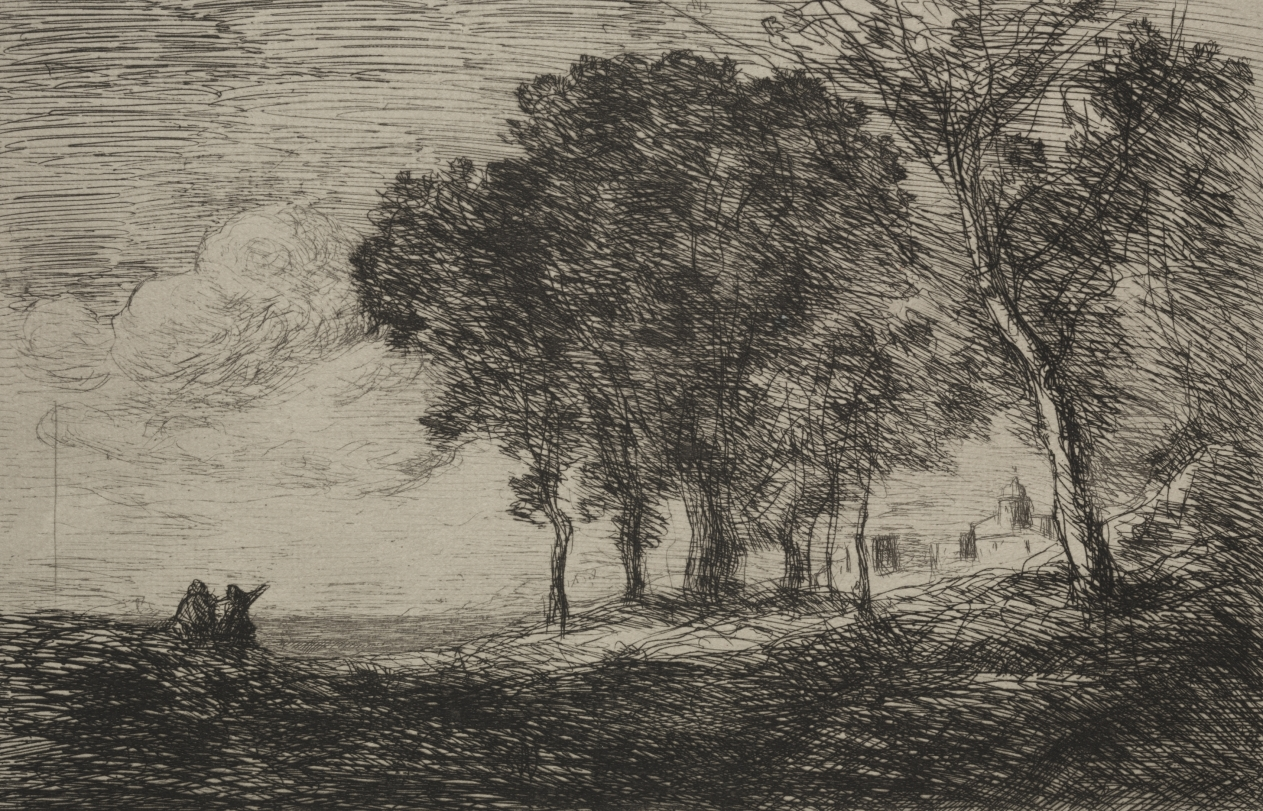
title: Italian Landscape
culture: France, 19th century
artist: Jean Baptiste Camille Corot (French, 1796–1875)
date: c. 1865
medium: etching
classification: Print